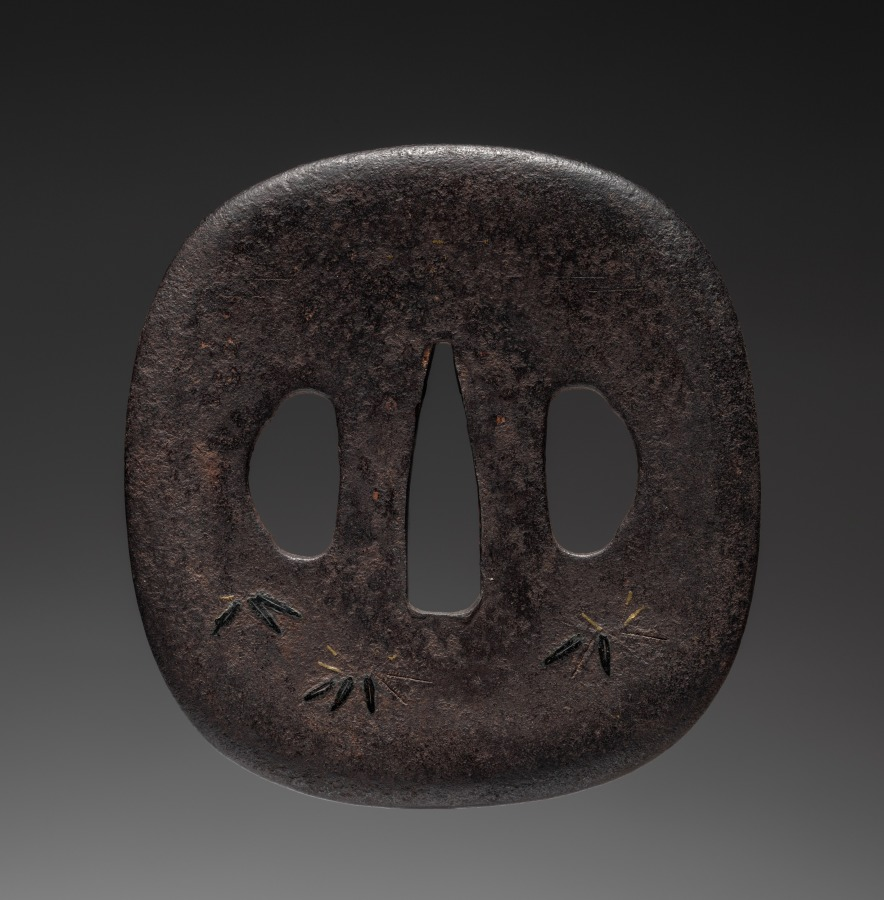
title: Sword Guard (Tsuba) with Landscape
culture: Japan, possibly Edo period (1615-1868)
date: c. 1615–1868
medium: iron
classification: Arms and Armor